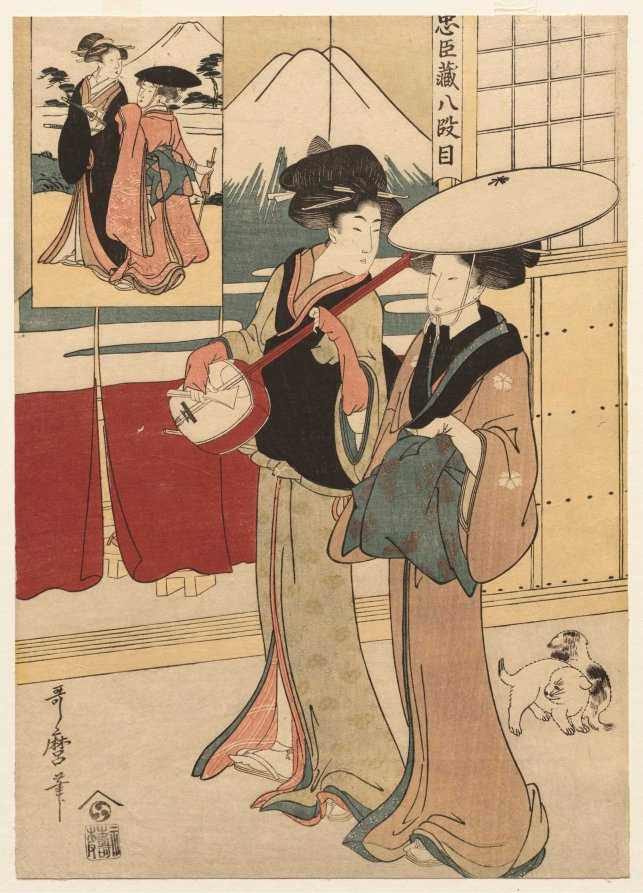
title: Chushingura: Act VIII of The Storehouse of Loyalty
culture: Japan, Edo period (1615–1868)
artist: Kitagawa Utamaro (Japanese, c. 1754–1806)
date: late 1790s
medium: color woodblock print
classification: Print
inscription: Artist's signature: Utamaro hitsu.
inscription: Publisher: Nishimuraya Yohachi (Eiju han, emblem).